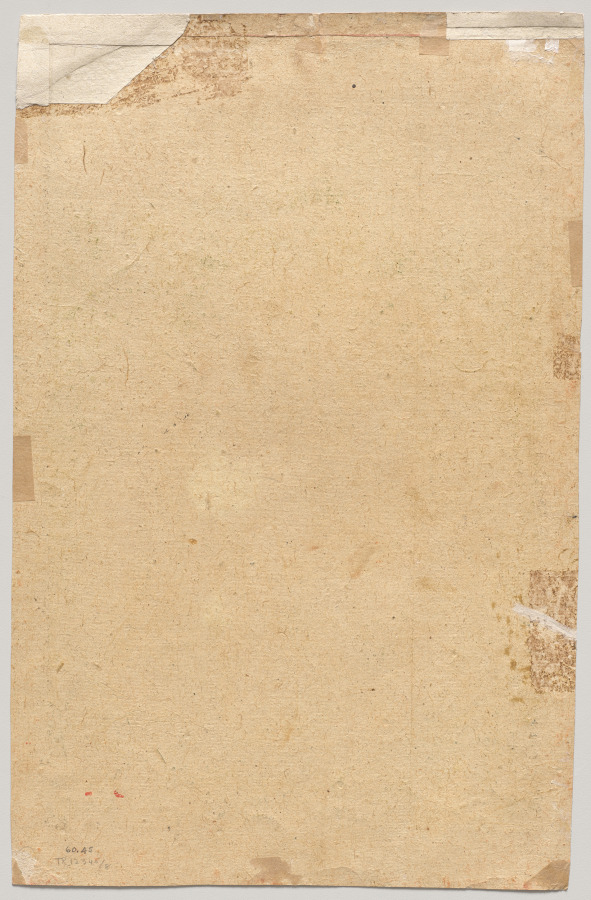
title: Krishna and the Gopis Gather for Rasamandala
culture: Northwestern India, Rajasthan, Rajput Kingdom of Kota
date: c. 1720–30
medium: Gum tempera, ink, and gold on paper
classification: Painting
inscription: Inscription at top in Sanskrit (damaged): "Moved by the coming of the Lord, the gopis went up to him and were overcome by the sight of Krishna, who was shining with moonlike splendor; then the Lord, who was a (love) thief, wearing yellow garments, smiled slightly with his lotuslike mouth. Radha said to her sakhi, 'He is certainly the God of Love.'" At the bottom in Hindi: "On the banks of the Jumna, the gopis are expressing their grief and sorrow as Krishna tells them he is leaving them."1 (Translation by J. Losty; although the Sanskrit verse is clearly from a Krishna text like the Gita Govinda, the source has not been identified.)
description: On the banks of a river full of lotus flowers, the blue god Krishna address the gopis, women of the cowherding community where he spent his youth. At first, they approach him, smiling and delighted, proclaiming that he is the god of love, shining like the full moon above. When he tells them that he is soon leaving them, they fall to the ground, distraught. Although the figures of the gopis are painted individually, with varied skin colors and garments, they act collectively.